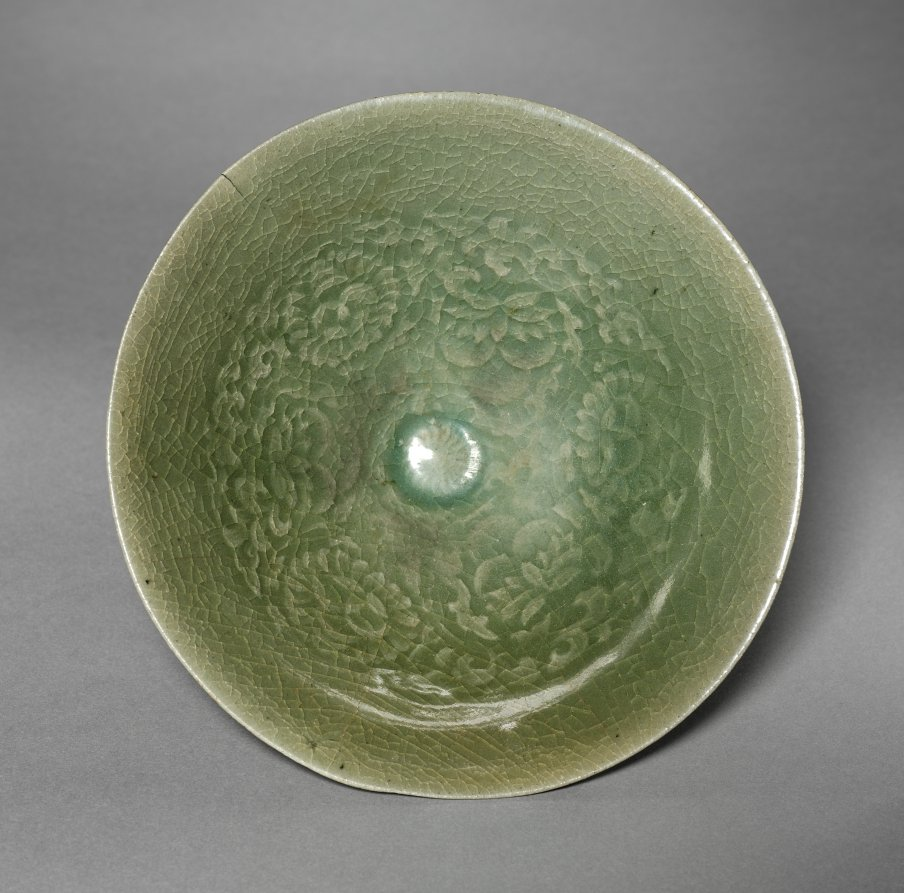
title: Bowl with Floral Scroll Design in Relief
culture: Korea, Goryeo dynasty (918–1392)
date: 1200s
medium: pottery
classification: Ceramic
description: As early as the seventh century, the practice of drinking tea and wine became an important part of elite culture in Korea. Elites of the Goryeo period commissioned a variety of types of utensils and vessels including this elegant tea bowl not only to make their drinking experience more exciting, but also to show their appreciation of nature.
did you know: The floral pattern of this bowl was created by a mold with carved patterns.